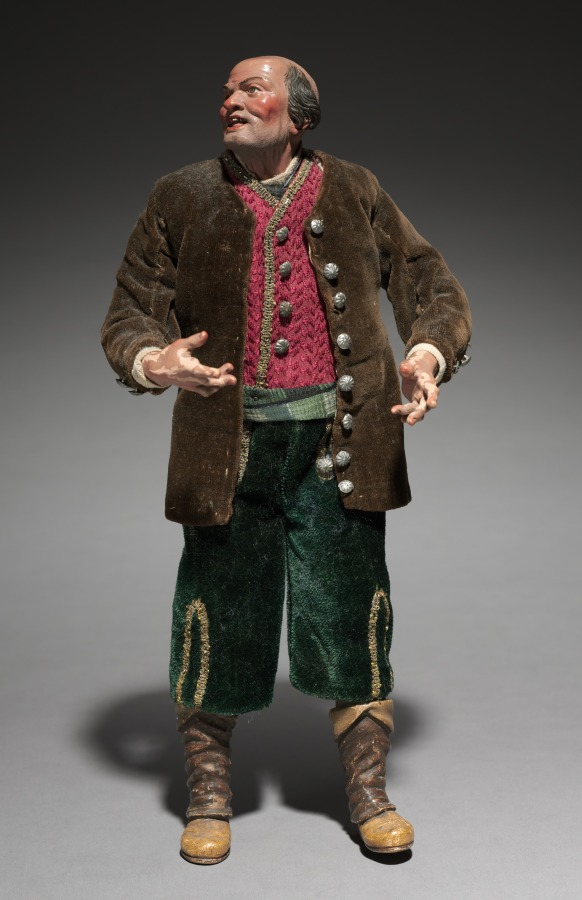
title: Figure from a Crèche: Standing Man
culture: Italy, Naples, late 18th-early 19th century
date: 1780–1830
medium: painted wood and terracotta with various textiles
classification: Sculpture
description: The practice of creating scenes of the Nativity for the home dates from the early 1700s in Italy, where people began to set up doll-like figures of about a foot or less in height. The custom was particularly popular in Naples around 1800, where crèche scenes (crèche means cradle, or crib) included many figures, whose heads and hands of painted terracotta, stuffed cloth bodies, and clothing adapted from contemporary local costumes gave them an amazingly realistic character. Representations of the birth of Jesus can be traced to the first few centuries of Christianity. Both living creatures and sculptural depictions of them were used from early times. By the late middle ages it was customary to create life-size figures of wood or stone, naturalistically painted, to represent the characters who participated in the events of Jesus's early life. These sculptures were then arranged in scenes illustrating one or both of the most important of these events, the Adoration of the Shepherds and the Adoration of the Magi-the three kings from the East who came to pay homage to the Christ child. Used in churches, these large figures were especially popular in Italy, Central Europe, Spain, and Portugal.